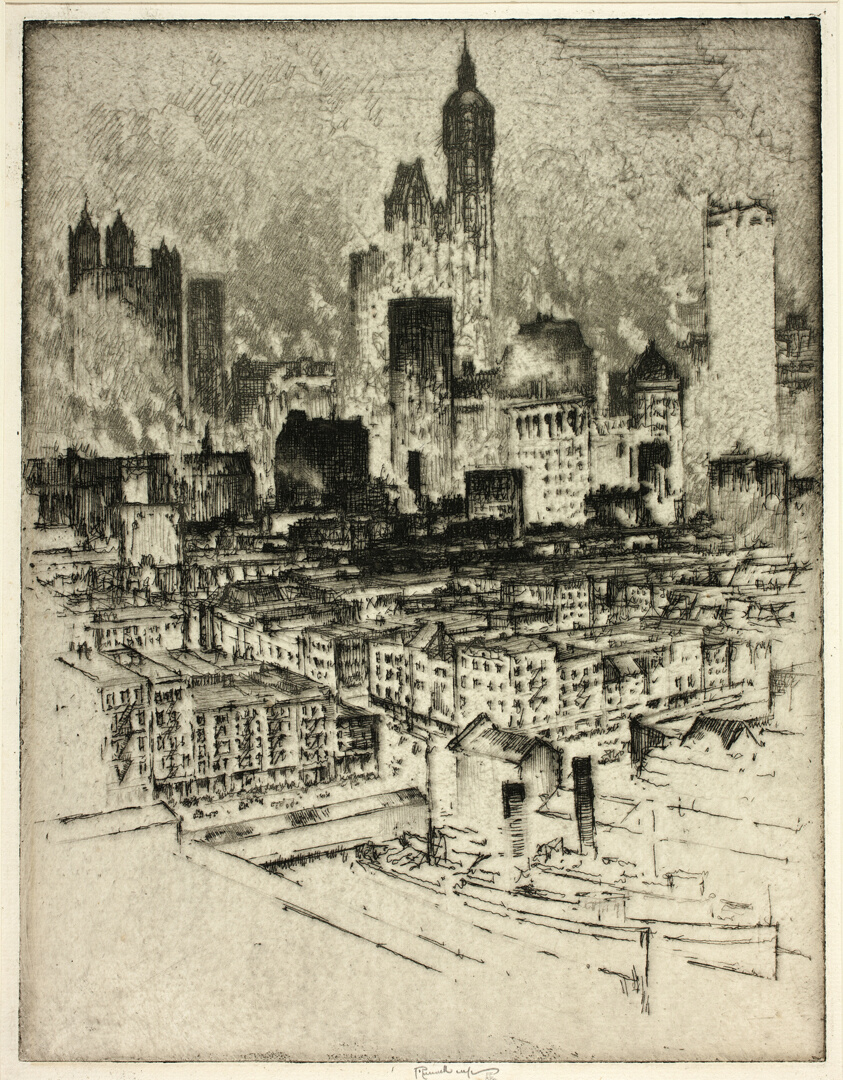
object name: Print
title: New York, from Brooklyn Bridge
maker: Joseph Pennell (American, 1857-1926)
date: 1908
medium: Etching on cream laid paper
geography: United States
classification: etching; print; prints and drawing